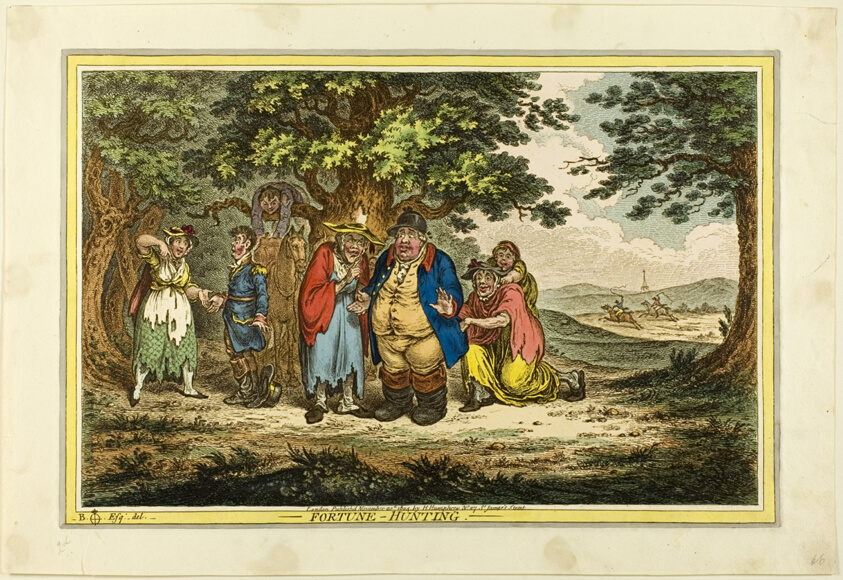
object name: Print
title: Fortune-Hunting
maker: James Gillray (English, 1756-1815); published by Hannah Humphrey (English, c. 1745-1818)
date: published November 20, 1804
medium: Hand-colored etching on paper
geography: England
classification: etching; print; prints and drawing